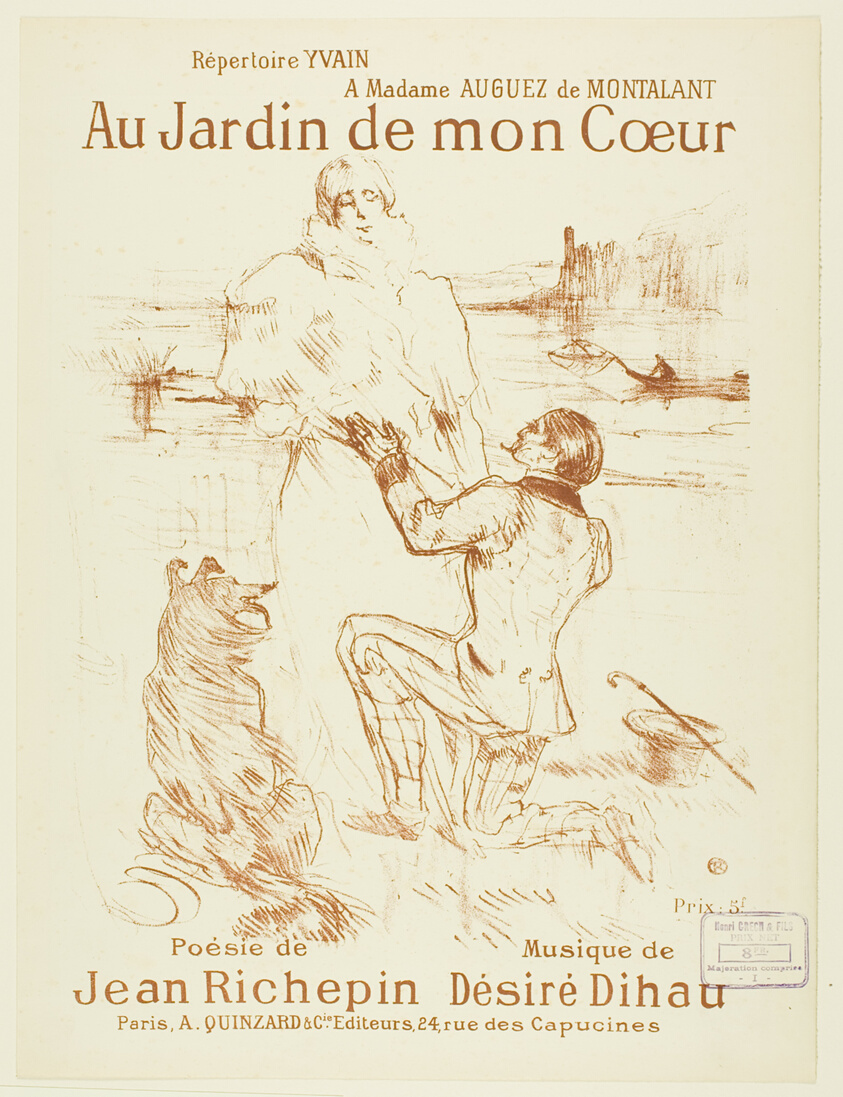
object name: Print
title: Proposal (first plate)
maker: Henri de Toulouse-Lautrec (French, 1864-1901)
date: 1898, published 1899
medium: Lithograph, with text added, on ivory wove paper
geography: France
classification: lithograph; print; prints and drawing